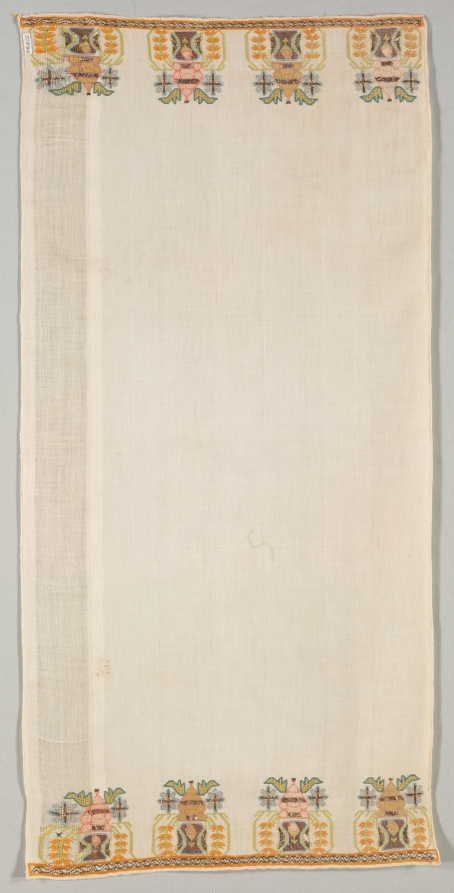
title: Embroidered Towel (Peshkir)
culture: Turkey, 19th century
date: 19th century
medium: embroidery: silk threads and metal strip pushed through fabric, bend and pressed on cotton tabby ground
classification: Embroidery